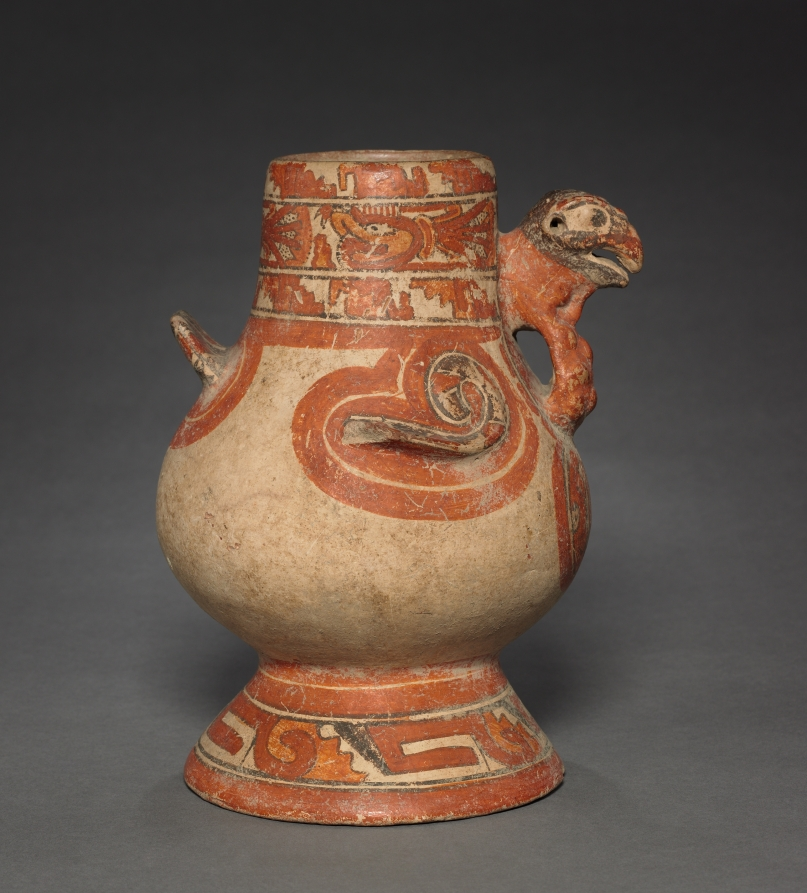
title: Turkey Vessel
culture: Costa Rica, Southern Nicoya region, Pataky Polychrome style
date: c. 1000–1550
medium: ceramic, slip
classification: Ceramic